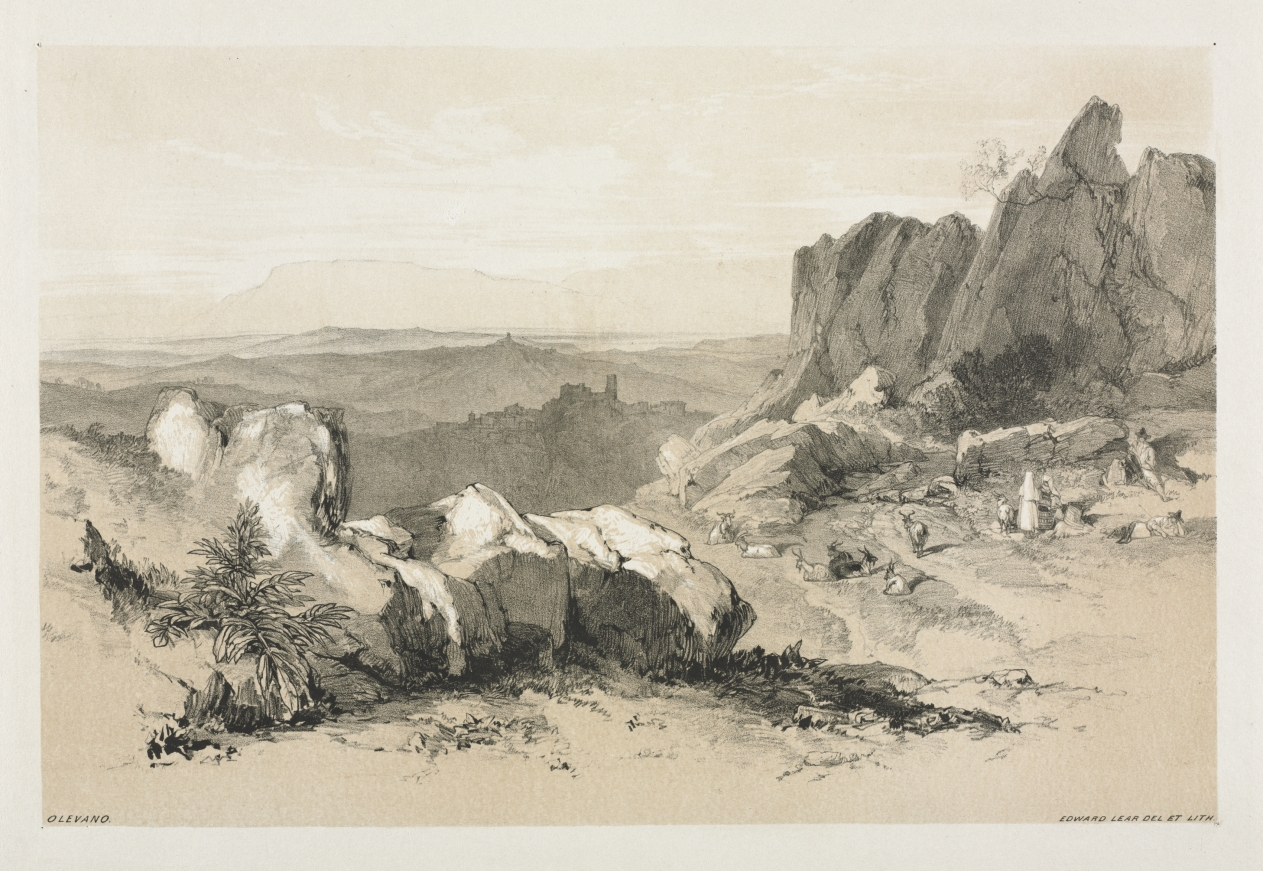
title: Olevano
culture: England, 18th century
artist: Edward Lear (British, 1812–1888)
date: 1841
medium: lithograph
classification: Print